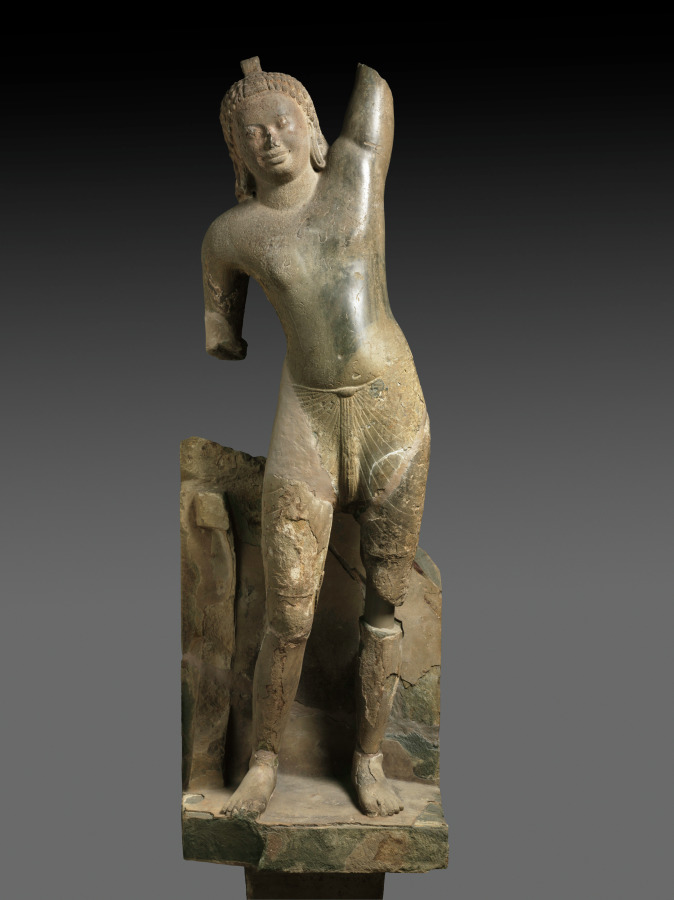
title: Krishna Lifting Mount Govardhan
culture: Southern Cambodia, Takeo Province, Phnom Da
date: c. 600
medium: Sandstone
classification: Sculpture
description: This masterwork of early Cambodian sculpture shows the Hindu god Krishna effortlessly holding aloft a mountain to protect his fellow villagers and herds from torrential storms sent by a jealous old god. It is one of eight monumental monolithic figures recovered from a two-peaked mountain in the floodplains of the Mekong River delta, on the outskirts of the ancient urban center of Angkor Borei.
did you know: Gold earrings were once fastened to the sculpture using holes in the figure's earlobes.